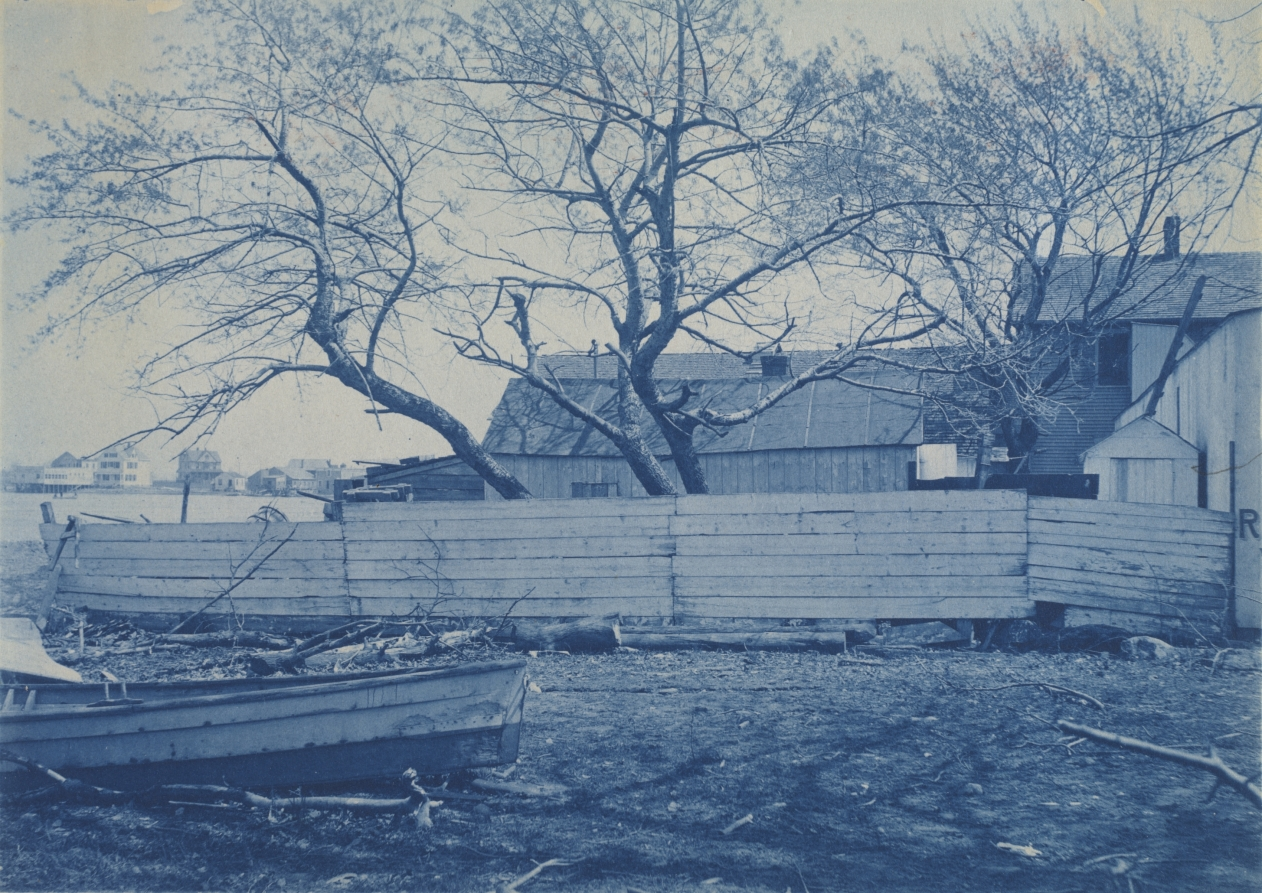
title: City Island, New York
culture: America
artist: Arthur Wesley Dow (American, 1857–1922)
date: c. 1900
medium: cyanotype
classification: Photograph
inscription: Written in pencil on verso: "City Island N.Y."; "1162"